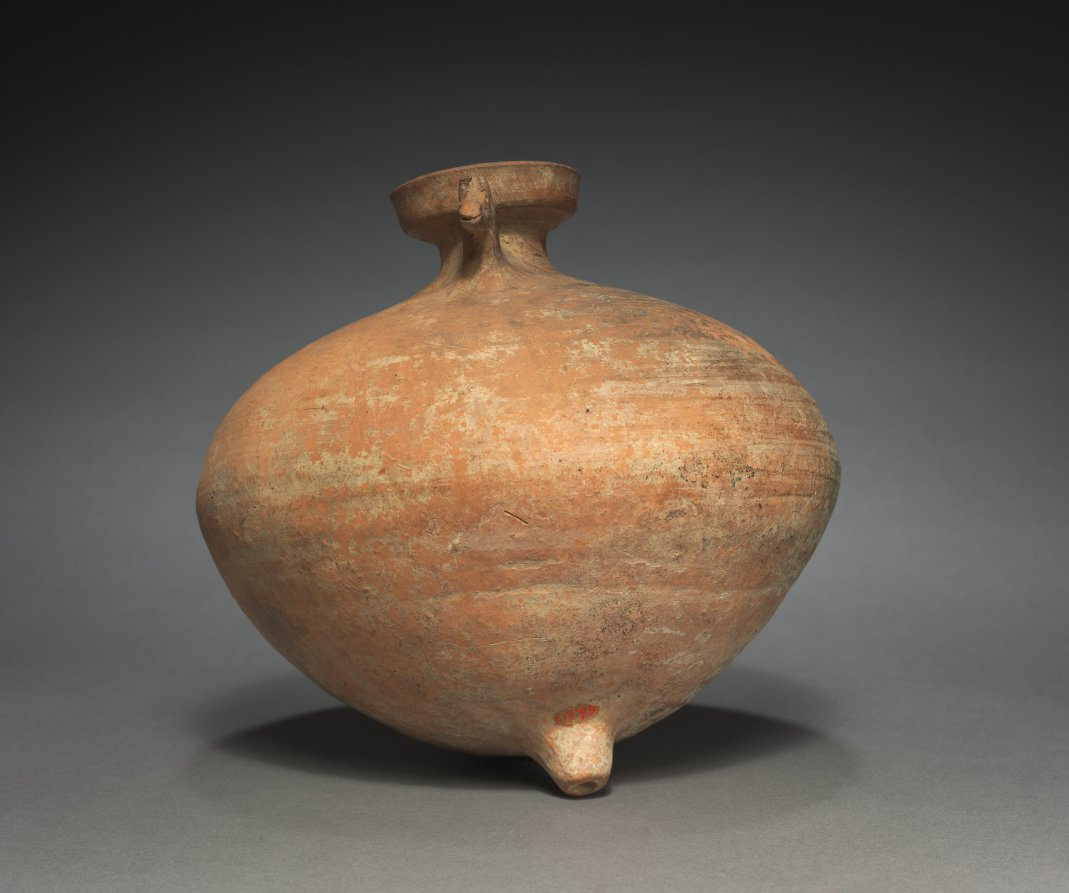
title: Rhyton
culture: Iran, Amlash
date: c. 1000–800 BCE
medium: terracotta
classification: Ceramic